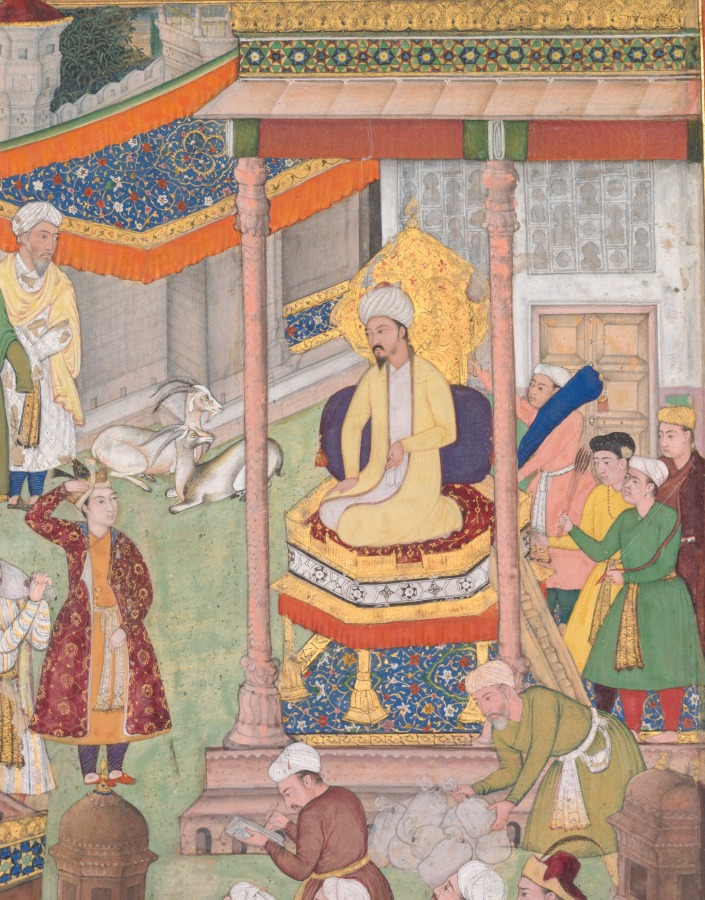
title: Babur receives booty and Humayun’s salute after the victory over Sultan Ibrahim in 1526, from an Akbar-nama (Book of Akbar) of Abu’l Fazl (Indian, 1551–1602)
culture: Mughal India, court of Akbar (reigned 1556–1605)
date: c. 1596–1597 or 1604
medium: Gum tempera and gold on paper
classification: Painting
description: The first Mughal emperor Babur sits enthroned as men bring gifts and sacks of tribute to mark a successful expansion of his territories. Emblematic of his role in leading the victory, his son Humayun wears a wine-and-gold robe of honor despite the Delhi heat in late April. Marking the royal space are a carpet and canopy painted with a lapis lazuli ground. The floral vine motif called arabesque swirls around a central lobed medallion. These delicate patterns are inspired from Persian manuscript illuminations. Contemporary historians describe awnings of gold embroidery, brocade, and velvet along with colorful carpets resembling a beautiful flower bed.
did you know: A clerk records the amount of tribute that Babur received from conquered kings.